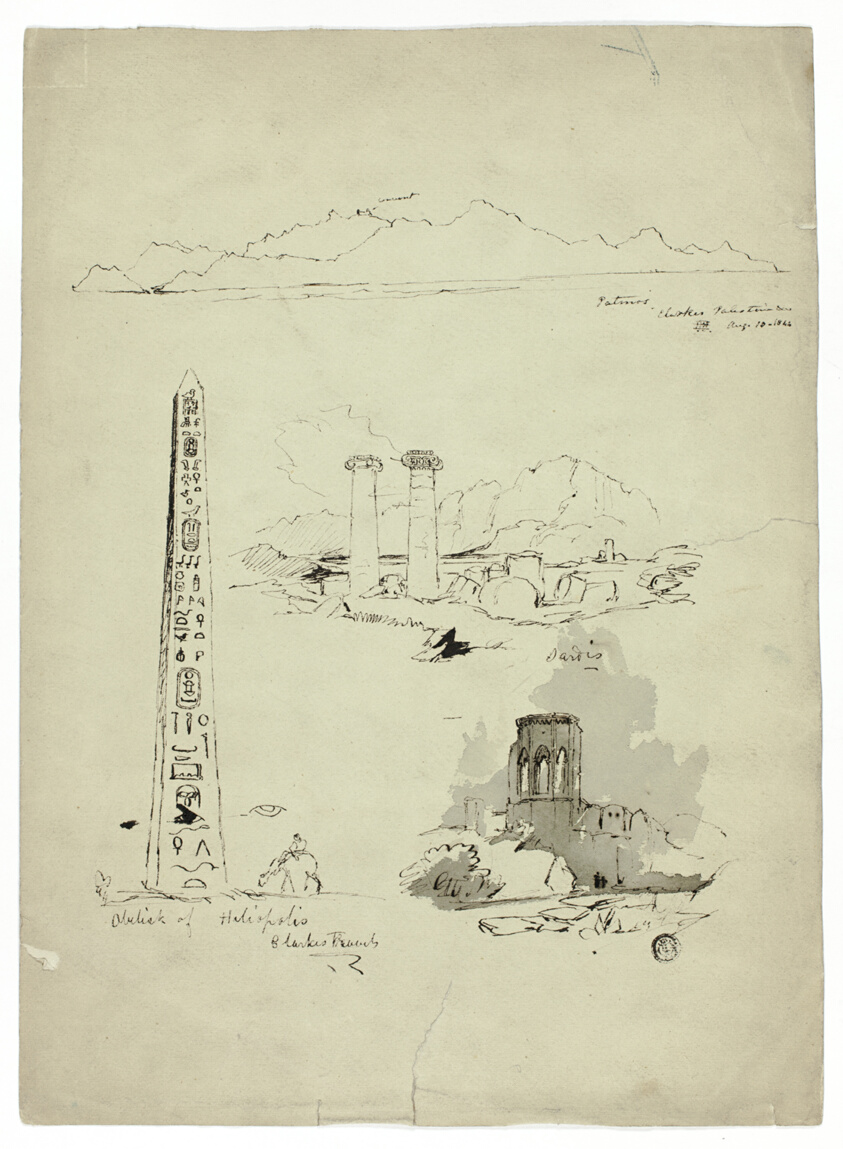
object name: Drawing and Watercolor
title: Sketches of Patmos, Sardis, Obelisk of Heliopolis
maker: Unknown artist (possibly British, 19th century)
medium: Pen and black ink, with touches of brush and gray wash, on green wove paper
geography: United Kingdom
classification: pen and ink drawings; drawings (visual works); prints and drawing